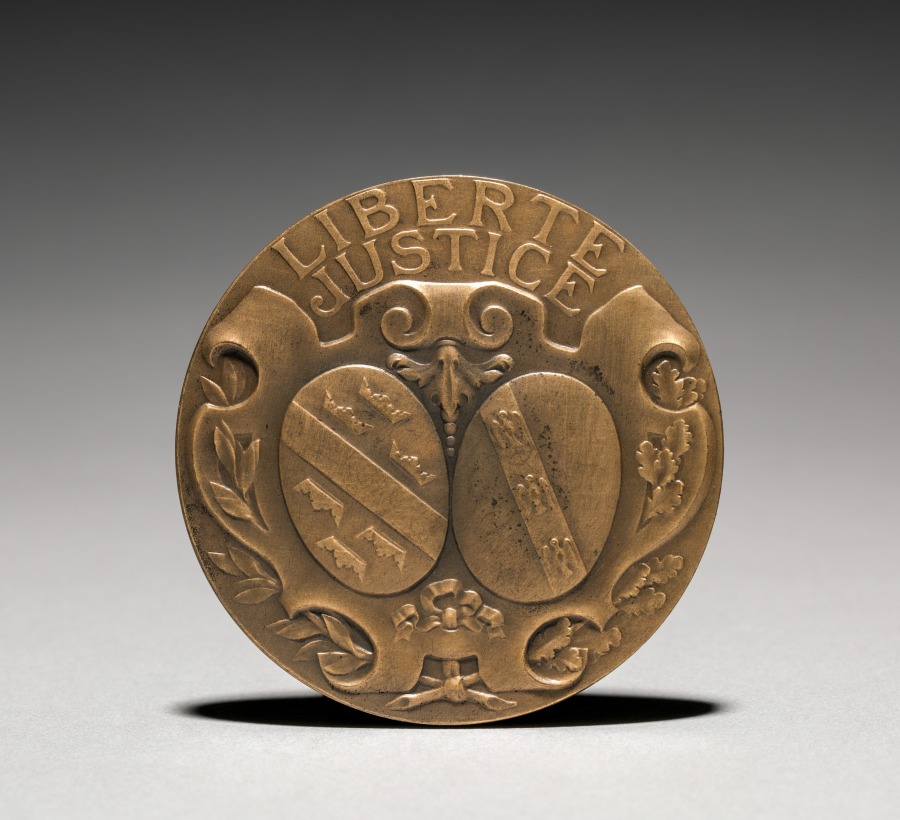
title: Medallion (reverse)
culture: France, 19th-20th century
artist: Charles-Theodore Perron (French, 1862–1934)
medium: bronze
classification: Metalwork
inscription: "LIBERTE"/"JUSTICE."